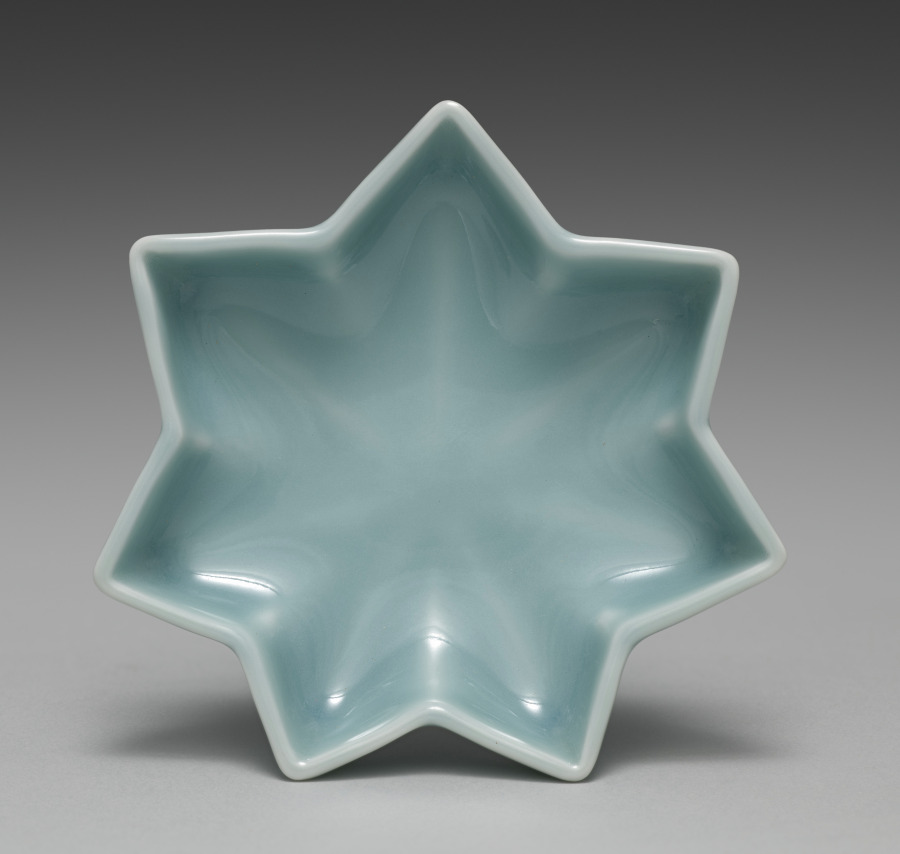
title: Saucer from Maple Leaf-Shaped Saucers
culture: Japan, Meiji period (1868–1912)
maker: Seifū Yohei III (Japanese, 1851–1914)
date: 1893–1914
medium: One of five dishes from a set of ten; porcelain with blue glaze and molded design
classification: Ceramic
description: These maple leaf–shaped saucers, like Yohei III's five shell saucers CMA 2022.188, have a long, horizontal box with a separate compartment for each piece. Now a set of five, these dishes were originally a set of ten, stored in two boxes of five each. From their housings, which accommodate differing numbers of objects, one can hypothesize that while some items created by the Seifu studio were intended to be acquired in larger sets, and thus were perhaps made to order, others, like these, may have been items to be purchased of the shelf in set quantities that allowed clients flexibility in scale. The box for these five saucers describes them as “heavenly blue[–glazed] porcelain” (tenseiji). The veins of the leaves are slightly raised in the clay so that the glaze pools around them and they stand out as white where the glaze thins. There are longer lines at the points of the leaves and shorter ones following the wall of each indentation so that the design has both a horizontal and a subtle vertical dimension.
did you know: These saucers shaped like maple leaves show Seifū Yohei III’s “heavenly blue glaze.”